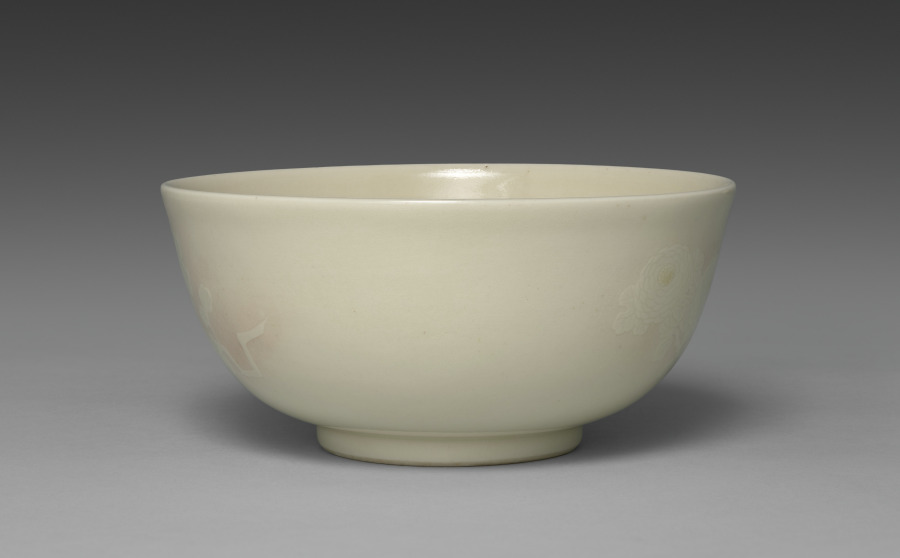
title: Sweets Bowl with Chrysanthemums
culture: Japan, Taishō period (1912–26) or Shōwa period (1926–89)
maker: Seifū Yohei IV (Japanese, 1872–1951)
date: 1914–46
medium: Porcelain with molded and carved design, underglaze color, and cream glaze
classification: Ceramic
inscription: 清風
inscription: 成山清風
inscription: 清風造 【印】 清風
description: Sweets bowls hold the confections enjoyed when drinking tea. This bowl and CMA 2022.206 offer an important lesson in appreciating Yohei IV’s ceramic practice. While they have the same design and shape and are made with the same materials, the execution of the pieces makes them entirely different after close inspection, thereby demonstrating the range of possible production results from a single template. Each bowl has the same composition of two different types of chrysanthemum flowers, one with long, slim, knifelike petals and the other with short, rounded, multilayered petals, shown running around its surface in low relief. The centers of the flowers are painted with yellow under the glaze. Yohei III formulated a number of new underglaze colors during his career, and this is likely one of them. For both bowls here, Yohei IV used his father’s kanpakuji formula, with underglaze pink for the gradated wash of color surrounding the flowers. The storage box lid provides abbreviated descriptions of the complex processes used in the surface decorations. It identifies the bowl as “Sweets dish with carved picture of chrysanthemum in kanpakuji.” The box has Yohei IV’s signature on the lid’s exterior, along with a seal reading “Seizan Seifu” 成山清風. The ink inscriptions are done in an elegant semiformal calligraphy. This bowl is more subtle and smooth in both the effect of the glaze and the execution of the relief. The designs are centered on the body between rim and foot. A closer look at the delineation of the flower petals reveals that the designs differ at times with respect to which petals appear in front or behind others. The centers of the bases of both bowls are incised with “Seifu” in a manner matching many other works by Yohei IV, although there are slight differences. As one might expect from the other differences in the bowls, the characters on the base of this subtle bowl are gentler, finishing in a tapering out of the strokes. Those on the bold bowl, CMA 2022.206, end in triangular pinheads.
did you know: This ivory and pink bowl by Seifū Yohei IV show his father’s “bright-jewel white porcelain” technique.